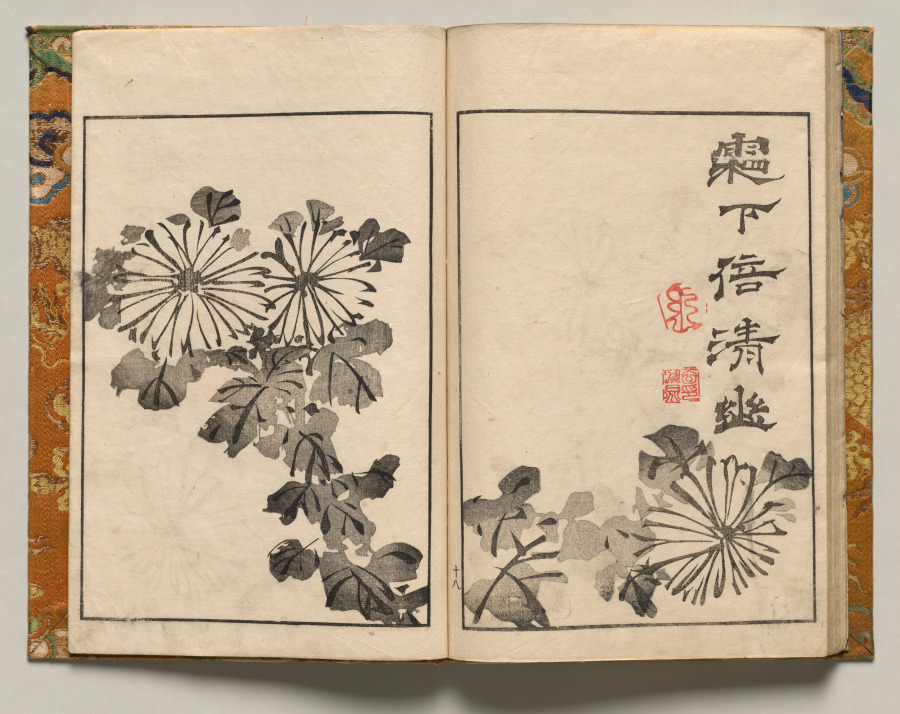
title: Abidingly Quiet Beneath the Frost, Design Eighteen from Shazanrō Picture Book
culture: Japan, Edo period (1615–1868)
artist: Tani Bunchō (Japanese, 1763–1841)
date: 1816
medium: Woodblock-printed book; ink and color on paper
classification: Bound Volume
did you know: Shazanrō was one of Tani Bunchō's style names.